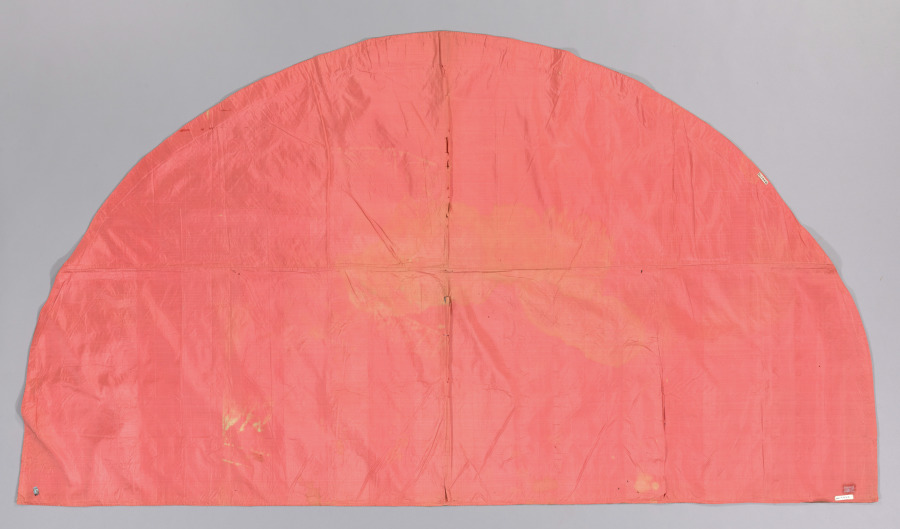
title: Fragment of a Cope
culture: Italy, Venice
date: 1700s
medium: brocade; silk and metal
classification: Textile